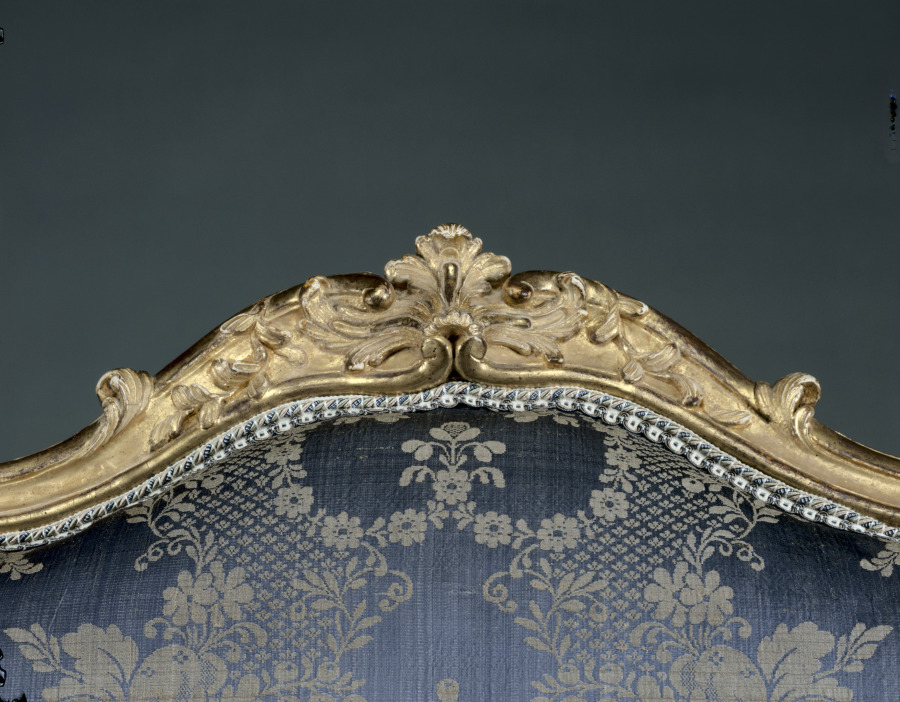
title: Armchair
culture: France, 18th century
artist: attributed to Nicolas Heurtaut (French, 1720–1771)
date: c. 1755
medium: carved and gilded wood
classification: Furniture and woodwork